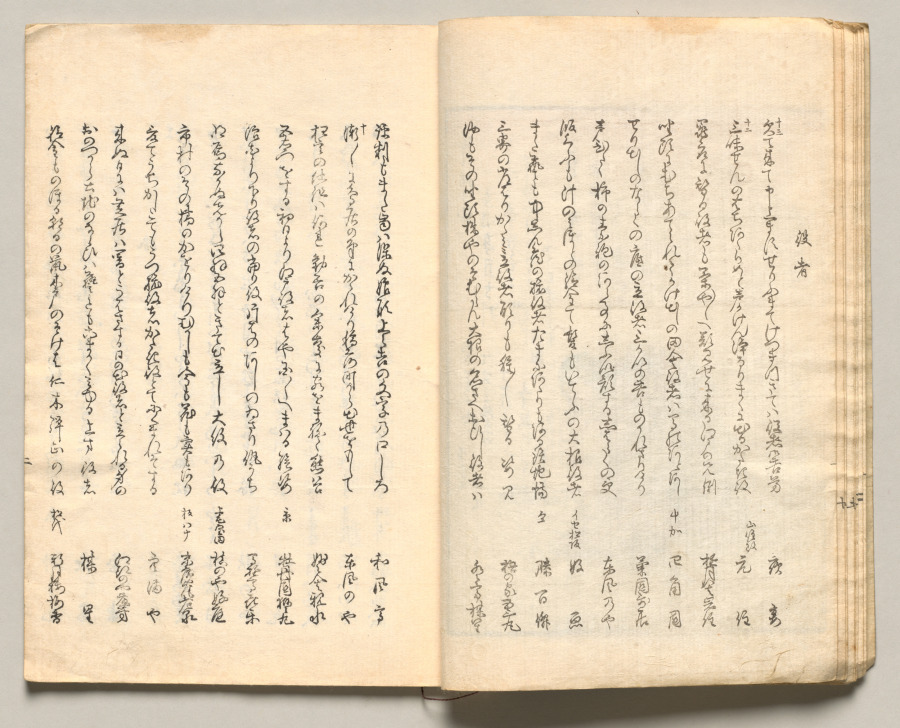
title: Spread Nine from Volume Five of People of Japan in Light Verse (Kyōka)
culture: Japan, Edo period (1615–1868)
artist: Utagawa Hiroshige (Japanese, 1797–1858)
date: 1857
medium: Woodblock-printed book; ink and color on paper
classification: Bound Volume